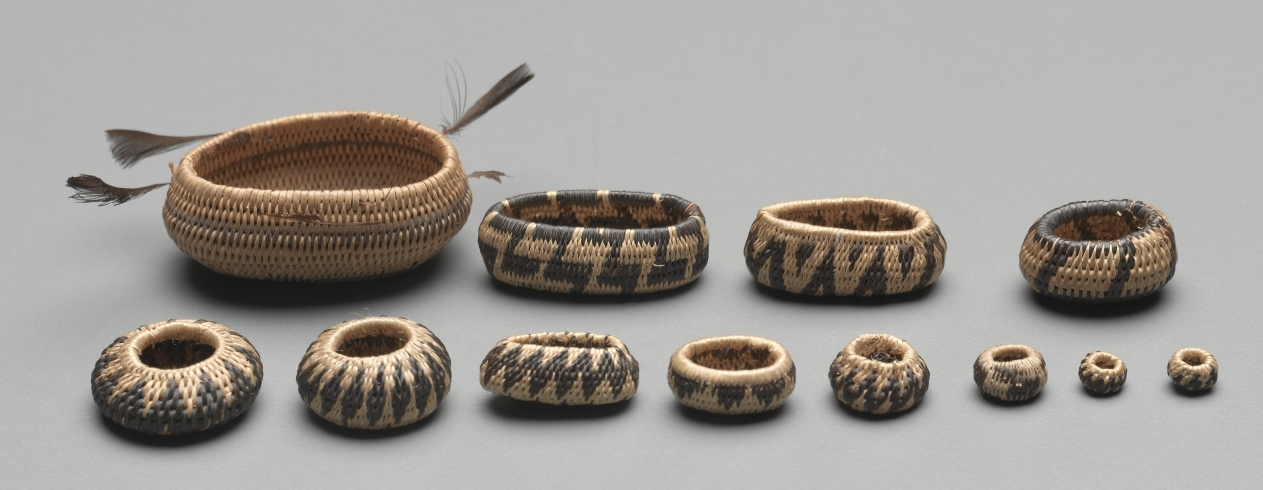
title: Miniature Rhomboidal Basket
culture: California, Pomo, 20th century (?)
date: Early 1900s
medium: coiled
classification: Basketry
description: Miniature baskets were made to demonstrate the basket-maker’s virtuoso skill, and these tiny marvels seem to be no exception—the smallest are just a few millimeters wide but still patterned. For such fine work, dexterity was required as much for preparation of materials as for weaving.